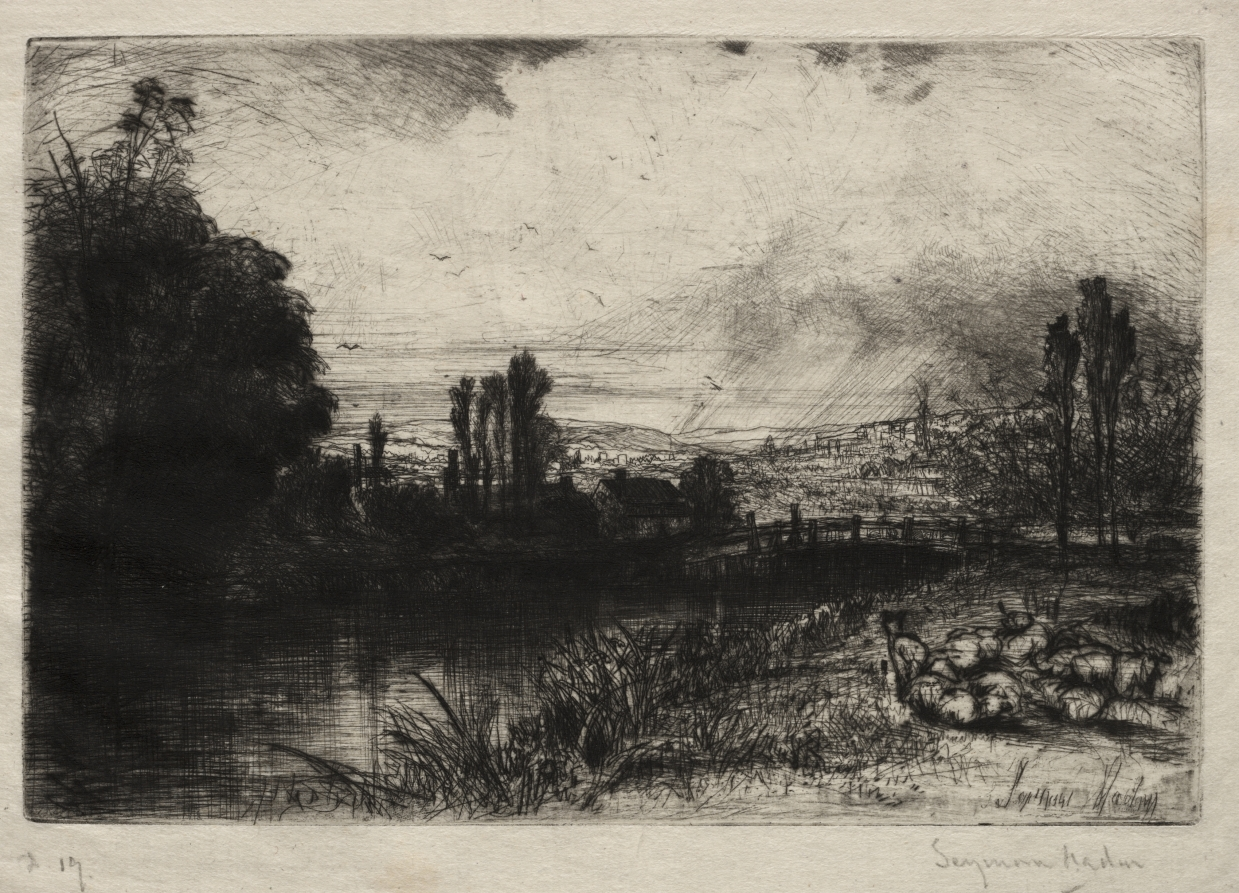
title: On the Test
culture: England, 19th century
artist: Francis Seymour Haden (British, 1818–1910)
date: 1859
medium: etching and drypoint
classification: Print